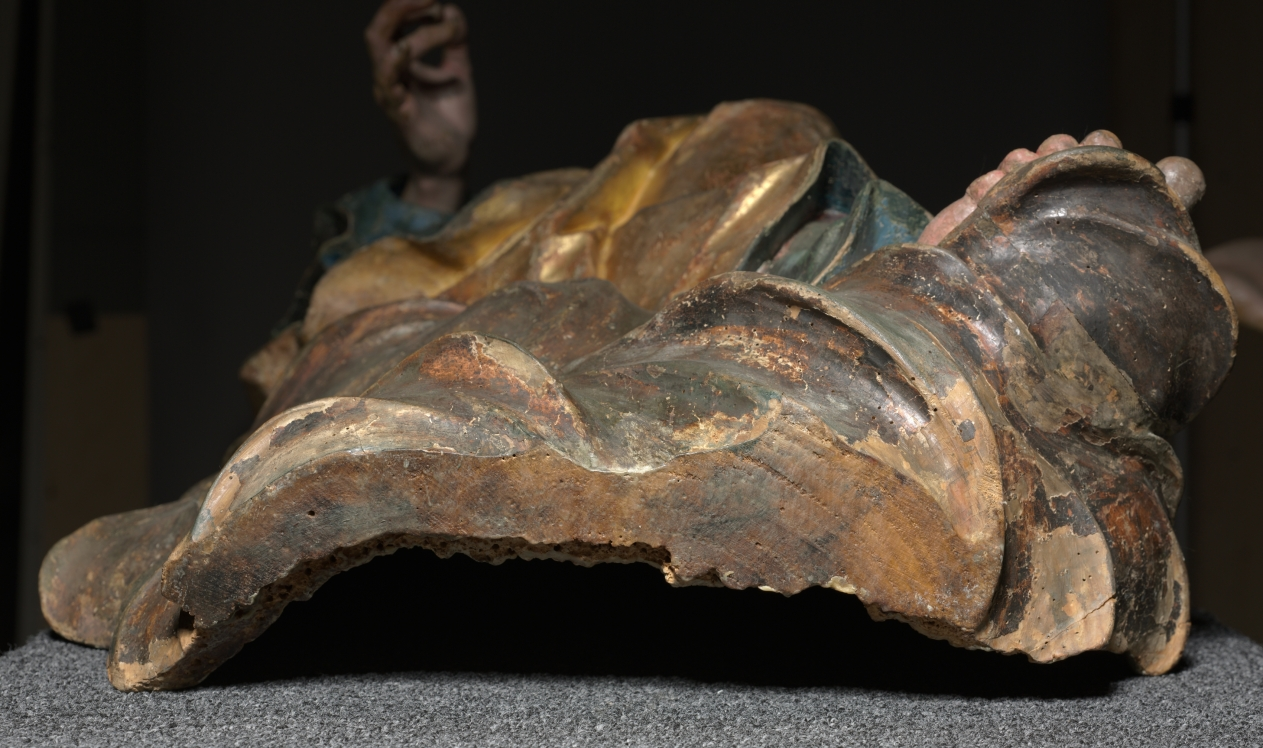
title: God the Father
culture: Austria, Lambach, 18th century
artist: Johann Peter Schwanthaler (Austrian, 1720–1795)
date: c. 1760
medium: painted and gilded wood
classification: Sculpture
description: Johann Peter Schwanthaler belonged to a renowned family of sculptors that produced works for religious and domestic settings throughout Bavaria, Austria, and southern Germany for more than 250 years. This imposing image of God the Father would have formed part of a larger group, probably at the top of an altar. The figure displays the characteristic features of Schwanthaler’s style, such as the elongated figural proportions, sharp-edged drapery folds, and the beautifully expressive, anatomically detailed hands.